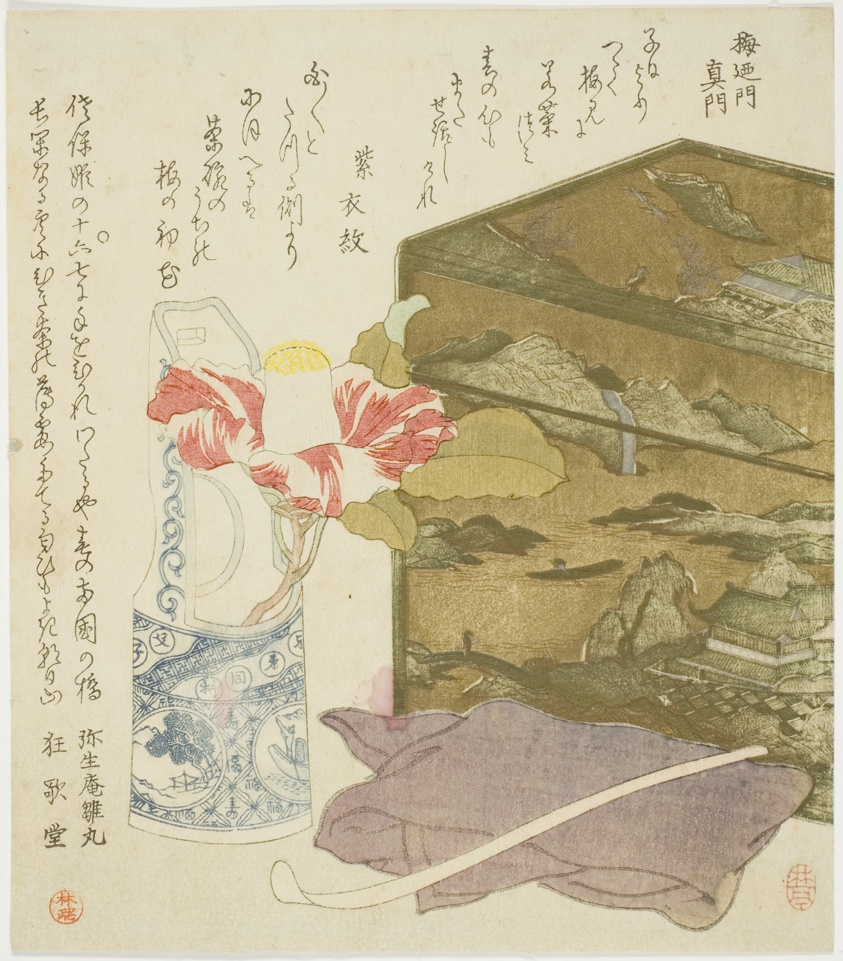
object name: Print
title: Camellia in Vase and Tea-utensil Box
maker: Rintei (Japanese, 19th century)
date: 1820s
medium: Color woodblock print; shikishiban, surimono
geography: Japan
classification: woodblock print; print; asian art